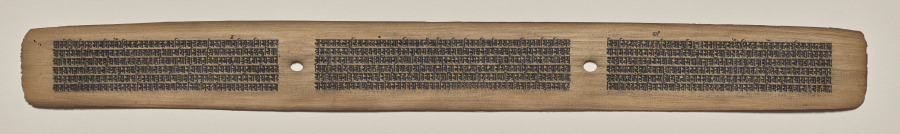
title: Text, Folio 30 (recto), from a Manuscript of the Perfection of Wisdom in Eight Thousand Lines (Ashtasahasrika Prajnaparamita-sutra)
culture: Eastern India, Bihar, Vikramashila Monastery. Painting: Nepal, Kathmandu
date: Sunday, September 14, 1119 (year 239 of the Newar Samvat in the month of Ashvina)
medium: gum tempera and ink on palm leaves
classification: Painting